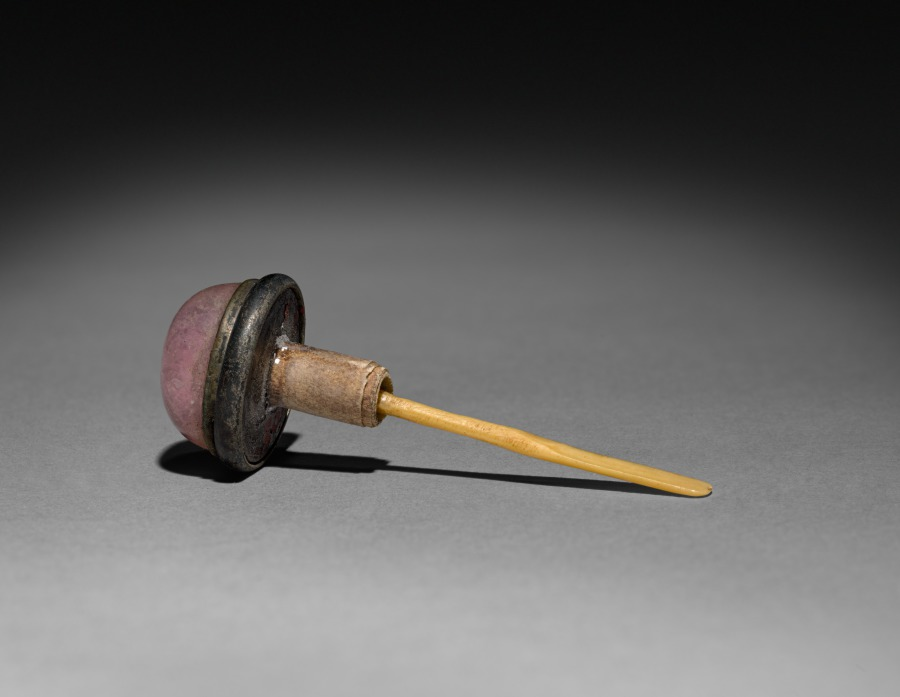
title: Snuff Bottle (stopper)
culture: China, Qing dynasty (1644-1911)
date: 1644–1911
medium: glass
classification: Glass